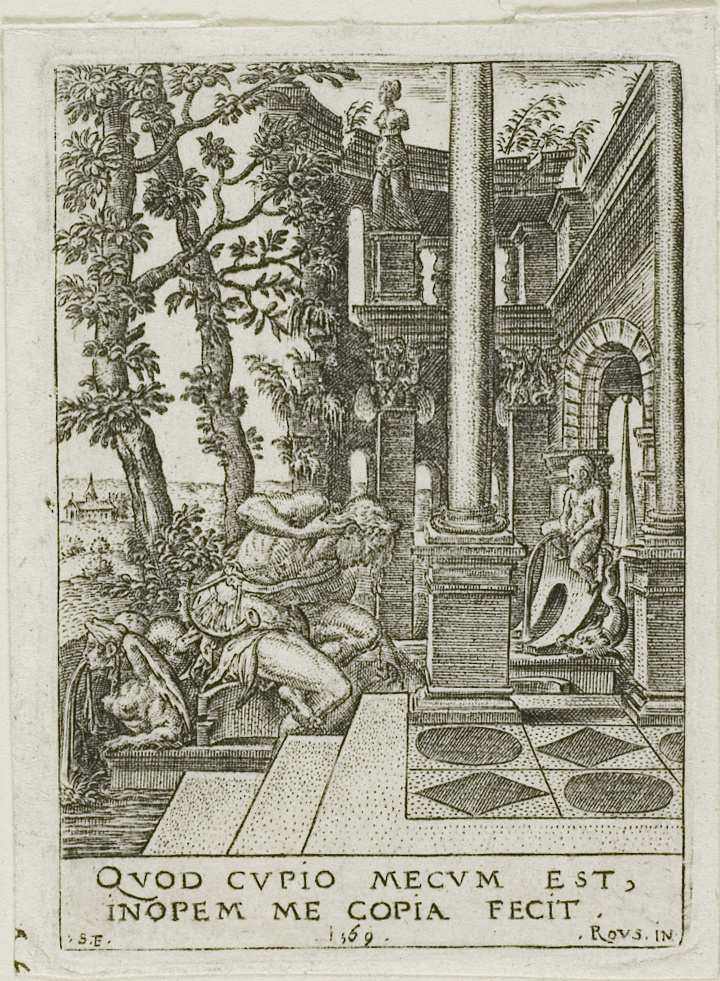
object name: Print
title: Narcissus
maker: Etienne Delaune; French, c. 1519-1583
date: 1569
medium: Engraving on paper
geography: France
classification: engraving; print; prints and drawing